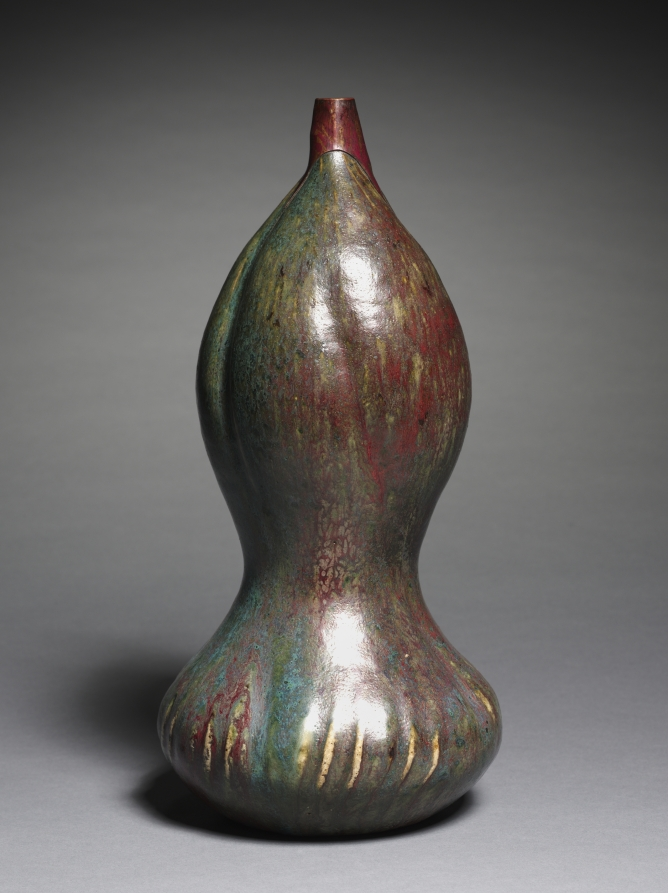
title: Vase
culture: France, 19th century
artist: Pierre Adrien Dalpayrat (French, 1844–1910)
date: c. 1890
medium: stoneware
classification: Ceramic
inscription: inscribed on base in ligature: "Dalpayrat."